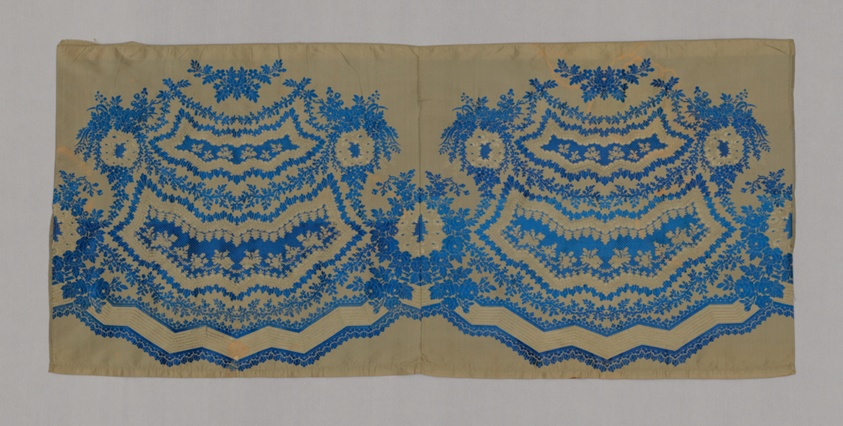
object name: Costume and Accessories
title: Fragment of a Woman's Skirt Flounce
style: 19th century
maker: Probably France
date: c. 1850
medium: Silk, warp-faced pattern woven to shape, on plain weave foundation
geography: France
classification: textile; weaving; costume - weaving; costume accessory; costume accessory worn at waist or below; costume component; fragment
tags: fashion, skirts, dresses, flowers, floral motifs, floral